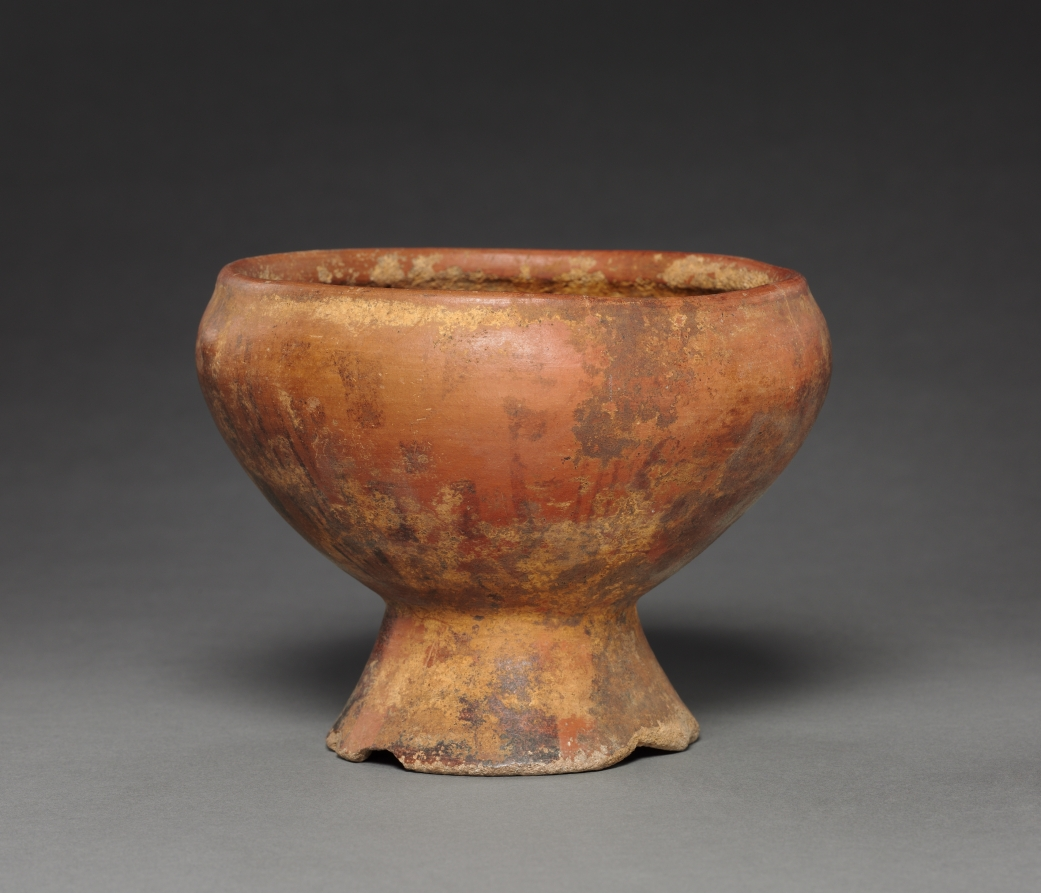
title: Vase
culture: Colombia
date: before 1550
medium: red ware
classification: Ceramic